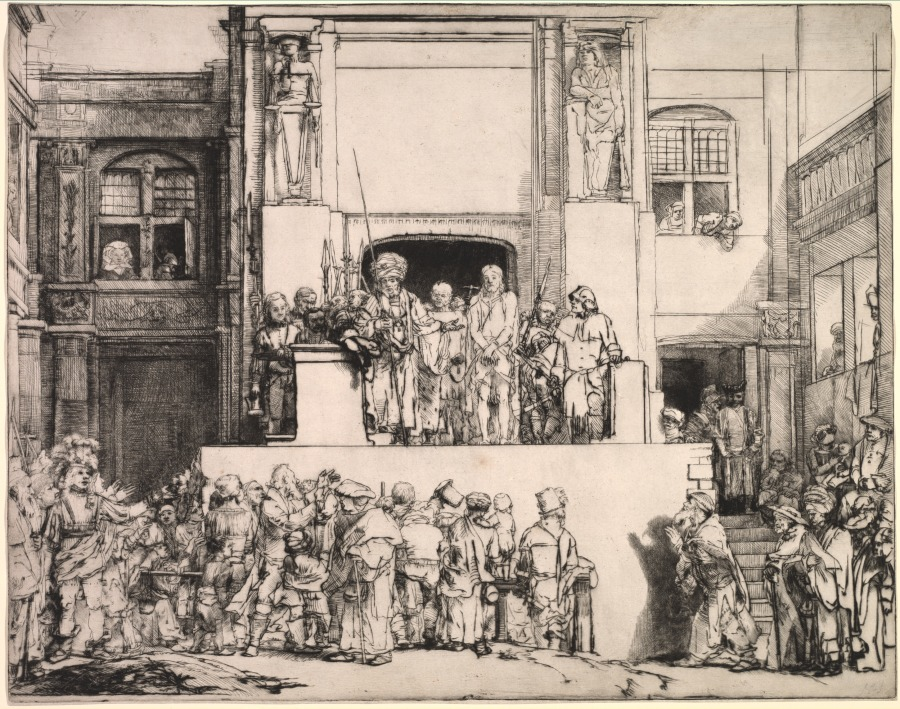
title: Ecce Homo. Christ Presented to the People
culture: Netherlands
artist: Rembrandt van Rijn (Dutch, 1606–1669)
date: 1655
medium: drypoint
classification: Print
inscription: Recto, upper left, in graphite: 79; lower left: FPS. Verso, in purple ink: Prince of Liechtenstein or Colnaghi for Liechtenstein stamp; in black ink, Zinser stamp, castle tower (rook chess piece); along side, in graphite: No. 36; along top: (illegible) name; upper left, in graphite: No 79 P(?) G (?) La Second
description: Rembrandt was an experimental and innovative printmaker and the first to execute works in pure drypoint on this monumental scale. Drypoint produces blurred lines and rich, velvety shadows, but these effects are lost as the plate wears. A limited number of rich impressions exist like this fine example of the fifth state, which demonstrates how Rembrandt redefined the expressive potential of printmaking. Rembrandt’s habit of drawing from life made him a keen observer of behavior and body language, endowing his biblical scenes with a human dimension and veracity not seen previously. The throng in Christ Presented to the People represents a cross section of the population and reflects the pictorial tradition that common humanity condemned Christ. Large areas of the imposing building, symbolizing the crushing weight and authority of the state, remain unworked so that blank white paper seems radiant in contrast to rich black shadows.